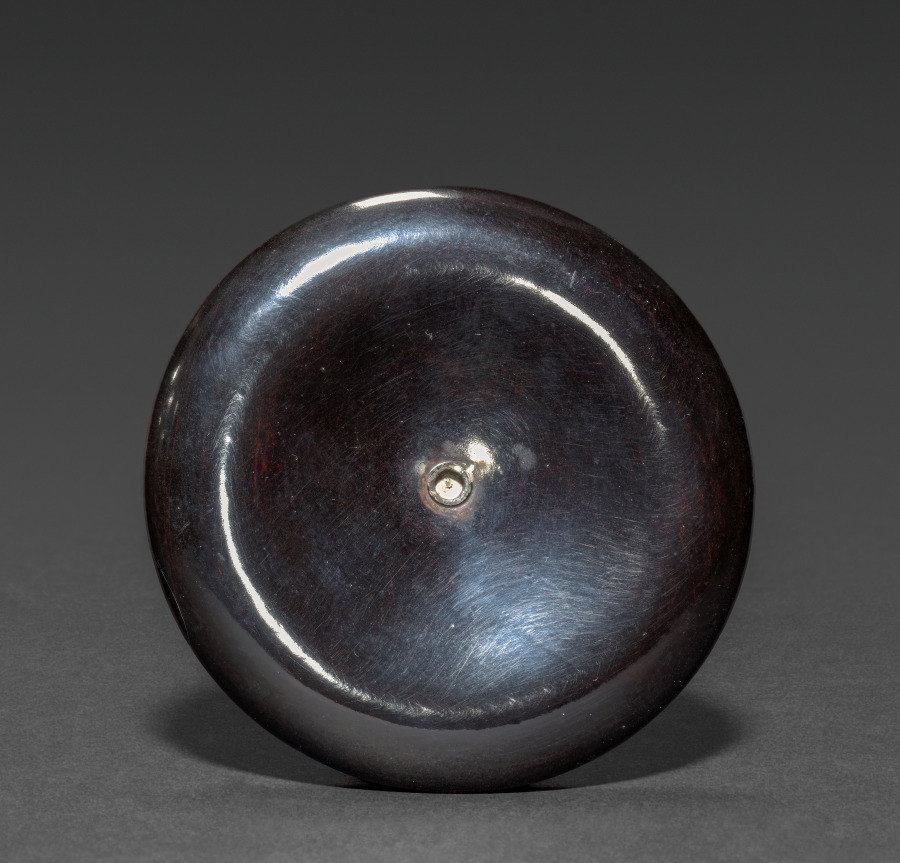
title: Jar with Wooden Cover (lid)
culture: Japan, Edo period (1615–1868)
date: 1700s-1800s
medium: pottery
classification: Ceramic